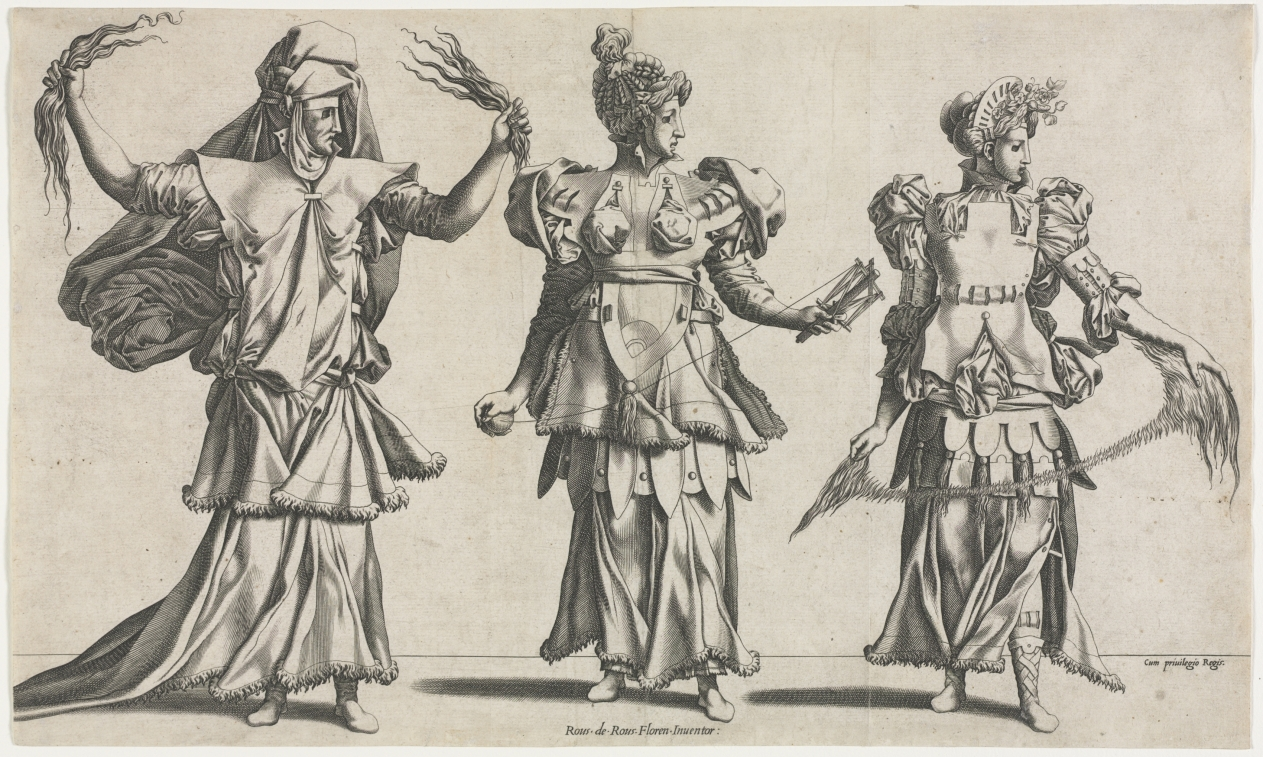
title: The Three Fates, Costume Designs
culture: Italy, 16th century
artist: Pierre Milan (French)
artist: after Rosso Fiorentino (Italian, 1494–1540)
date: c. 1534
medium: engraving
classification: Print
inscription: lower center, in plate: Rous·de·Rous·Floren·Inventor: ; lower right, in plate: Cum privilegiio Regis. ; VERSO, lower center, in graphite: 736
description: This engraving reproduces a trio of costume designs by Rosso Fiorentino. They were likely meant for a masquerade ball held at the court of King Francis I. Each figure represents one of the Three Fates, the female deities in Greek and Roman religion who controlled human destiny, often symbolized by cloth or thread—to indicate the spinning of human life. Here we see them holding (from left to right) wool, thread, and flax. Pierre Milan made a number of prints after the designs of Rosso Fiorentino. However, unlike the etchers working at the chateau of Fontainebleau, Milan worked as a professional engraver in Paris. His works have a cleaner, more polished look to them than the more experimental prints made at the chateau itself. Milan and his contemporaries in Paris formed an important group of printmakers who helped spread the Fontainebleau style. As professional printmakers with ties to the publishing industry, their works were printed in large numbers, unlike the rarer Fontainebleau etchings.